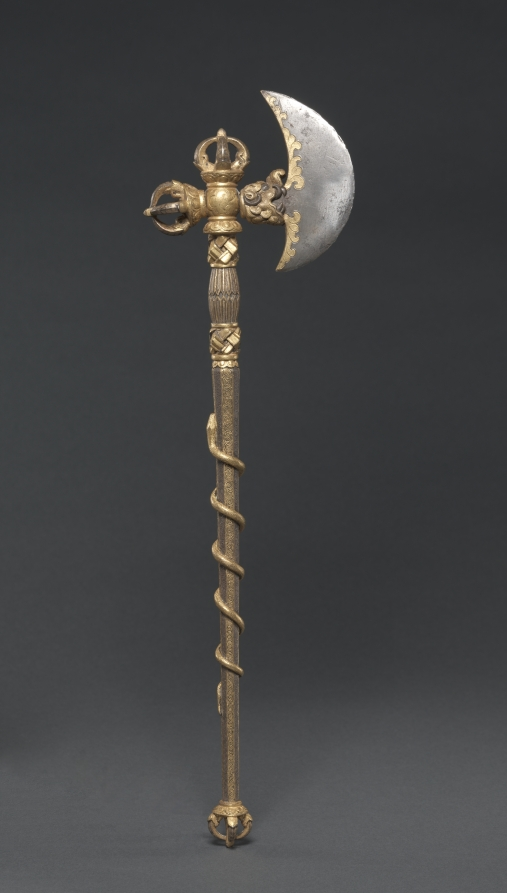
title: Ritual Axe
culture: Sino-Tibetan, Derge School, Yongle period (1403-1427)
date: c. 1407–1410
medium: iron alloy with gold and silver inlay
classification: Metalwork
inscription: Inlaid "Yung-lo" mark (1403-1425) in gold at tope of handle above snake's head.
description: Ceremonial weaponry was used in tantric rituals to combat obstacles to enlightenment, such as ignorance, delusions, and selfishness. In 1407, a high-ranking Tibetan monastic patriarch visited the emperor of the Ming dynasty, known as Yongle. The Yongle emperor presented him with a number of gifts, of which this ritual axe was probably a component, since the axe bears his identifying inscription in a cartouche. Imperial Chinese workmanship is noted in the lush rendering of the lion heads from which the blades emerge, the calligraphic serpentine forms, and the cloud motifs.